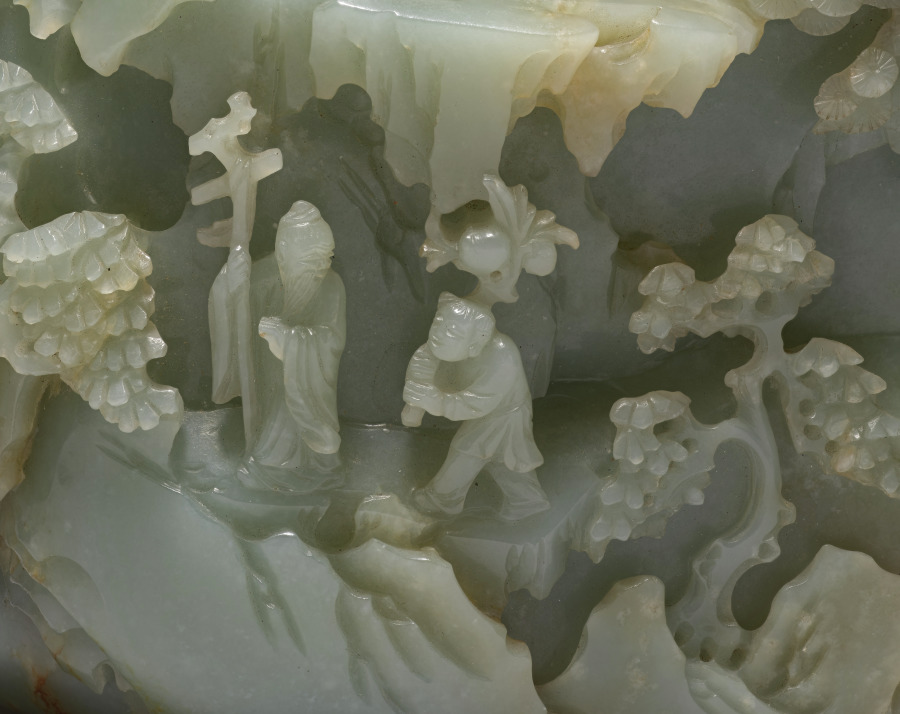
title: Miniature Mountain with Daoist Paradise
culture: China, Qing dynasty (1644–1911), Qianlong reign (1736–95)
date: 1736–95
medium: green jade with brown markings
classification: Jade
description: Sizable jade boulders of mountainous landscapes were carved to represent the search for the paradise or immortals' dwellings in the mountains. This Daoist theme has fired the Chinese imagination throughout history. Believed to have spiritual and magical properties, jade has long been used in tombs and intended for preserving the corporeal body and the soul in the quest for eternity. It is recorded that Daoist practitioners drank morning dews with scraps of jade as an elixir of immortality.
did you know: The bearded immortal is accompanied by a servant carrying a cluster of peaches, symbols of immortality.